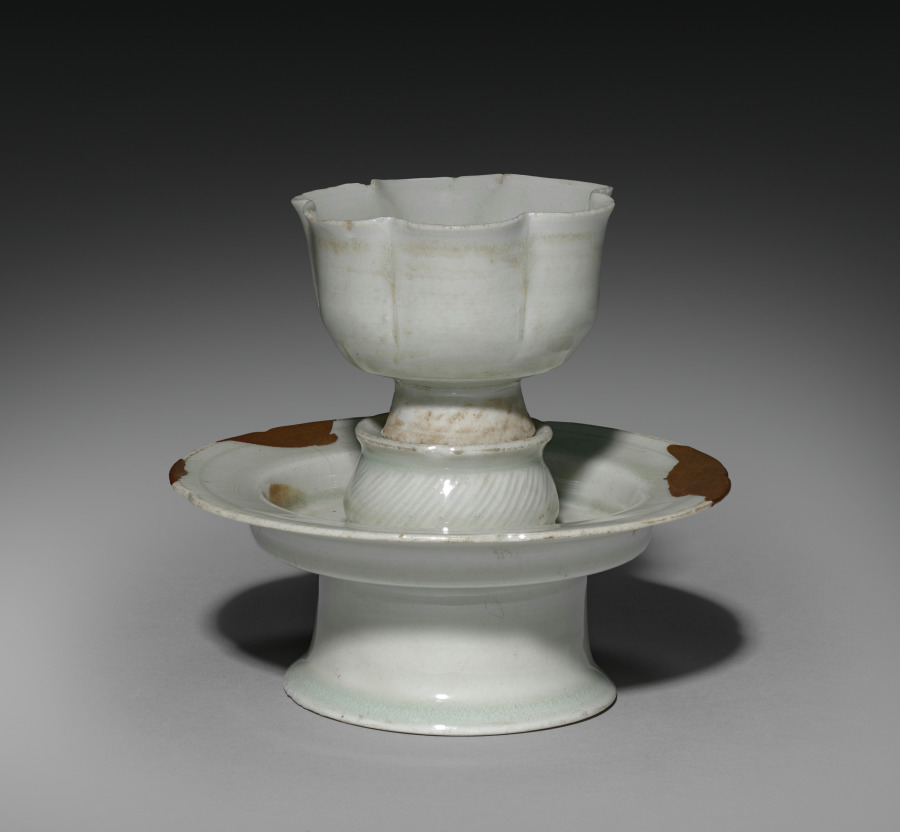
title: Cup and Stand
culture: Korea, Goryeo dynasty (918–1392)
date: 900s-1100s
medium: pottery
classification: Ceramic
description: As early as the seventh century, the practice of drinking tea and wine became an important part of elite culture in Korea. Elites of the Goryeo period commissioned a variety of types of utensils and vessels including this delicate-looking cup and cup stand, not only to make their drinking experience more exciting, but also to show their refined taste.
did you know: Many types of sophisticated stoneware examples such as this cup and cup stand were buried in the tombs of ruling class of the Goryeo dynasty (918–1392).